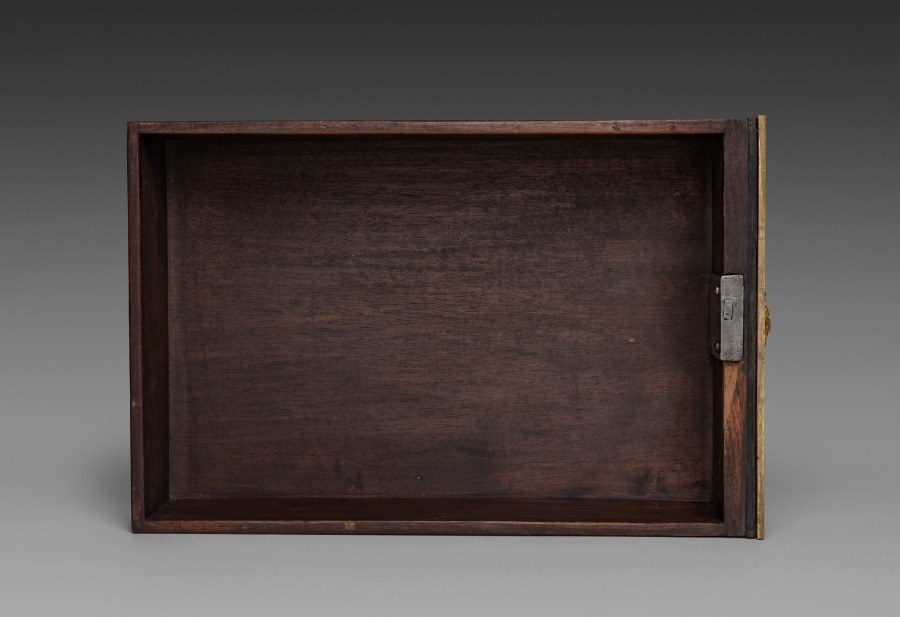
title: Side Drawer for Cabinet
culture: France, late 17th Century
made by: André-Charles Boulle (French, 1642–1732)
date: c. 1690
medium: ebony, marquetry in metal and tortoise shell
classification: Furniture and woodwork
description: Appointed cabinetmaker to King Louis XIV in 1672, André-Charles Boulle became a master of furniture making in France during the late 1600s until his death in 1732. Known primarily for his use of marquetry, in which metal patterns are inlaid into tortoiseshell then applied within the veneered surface of the furniture, Boulle established a level of quality and craftsmanship few others could achieve. As a result, his work found favor at the royal court and among other aristocrats and diplomats eager to impress the king. The inclusion of a medallion depicting Louis XIV within the bronze decoration of this chest would have identified the owner with the royal court. Often exhibiting stout architectural proportions with elegant groups of inlaid motifs such as the parrot on the central panel of this chest, Boulle’s designs are an example of the intellectual fashion for contrasting ideas, materials, and motifs.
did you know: Originally designed to sit atop an elaborate tall stand, this chest was likely altered in the late 1700s to reduce its scale and height.